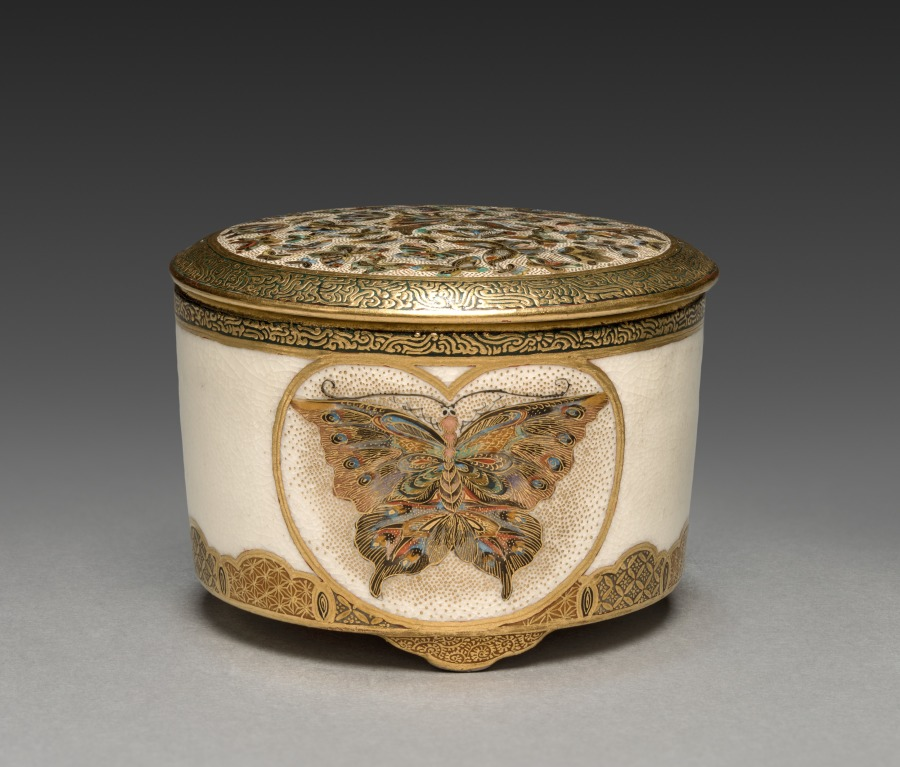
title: Jar with Butterflies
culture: Japan, Meiji period (1868–1912)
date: late 1800s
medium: porcelain (Satsuma ware)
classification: Ceramic